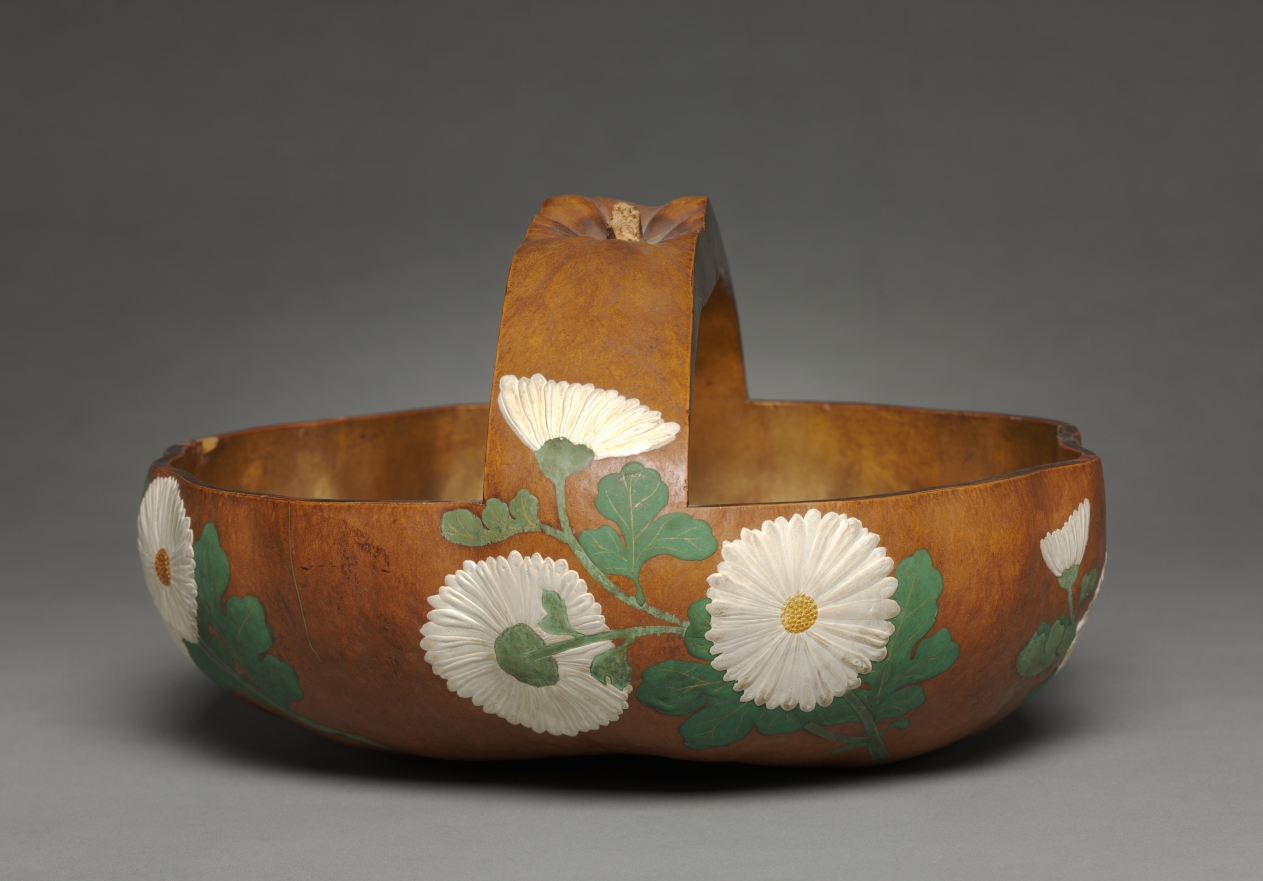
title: Gourd Basket with Chrysanthemum Design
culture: Japan, Edo period (1615–1868)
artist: attributed to Ogata Kōrin (Japanese, 1658–1716)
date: 1700s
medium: gourd; lacquered and painted with gesso, color, and gold pigments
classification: Miscellaneous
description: This very rare basket is made from a carved gourd and inscribed on the bottom with the signature of Ogata Korin (1658– 1716), a painter and lacquerer who founded the Rimpa school. Here, he applied the chrysanthemums with white gesso in relief. This basket is decorated with opaque green paint, and its inside is lined with gold.